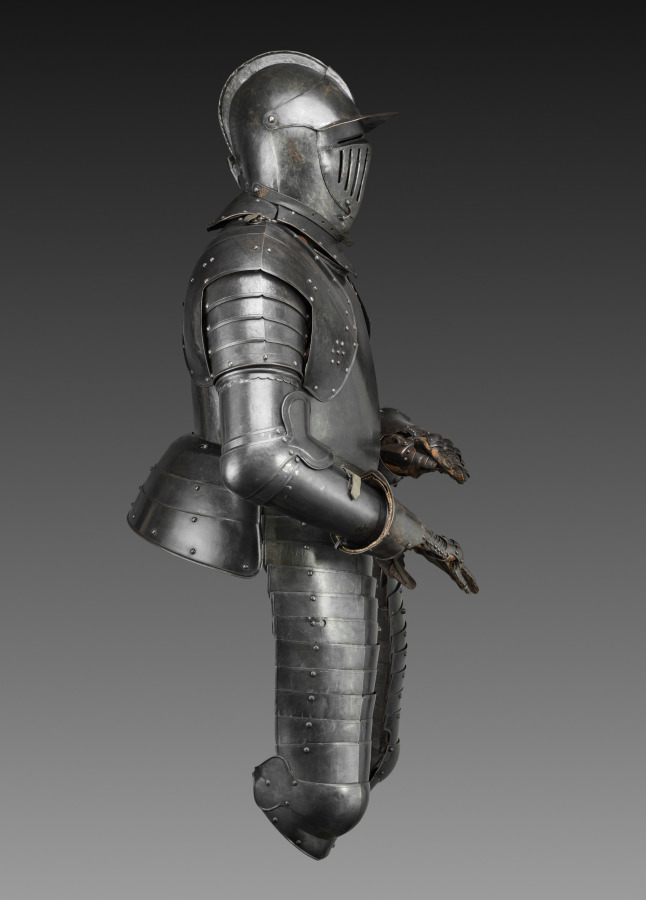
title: Cuirassier's Armor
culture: Austria, Graz(?), early 17th century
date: c. 1600–20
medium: steel (originally blued, now black); leather straps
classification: Arms and Armor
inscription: Proof mark (musket shot) is located on the proper left side of the breastplate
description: The cuirassier was the heavy cavalryman of the late 1500s and early 1600s. Carrying pistols and a sword, he was clad in full armor, like this suit, with the exception of his lower legs, which were protected by heavy riding boots. Shortly after 1650, such heavy cavalry armor disappeared from use. By then, European cavalries had abandoned full armor as impractical against the increased sophistication of firearms. Similar armors survive in the Armory of Graz, Austria.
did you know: This suit of armor is just over 5 1/2 feet tall.